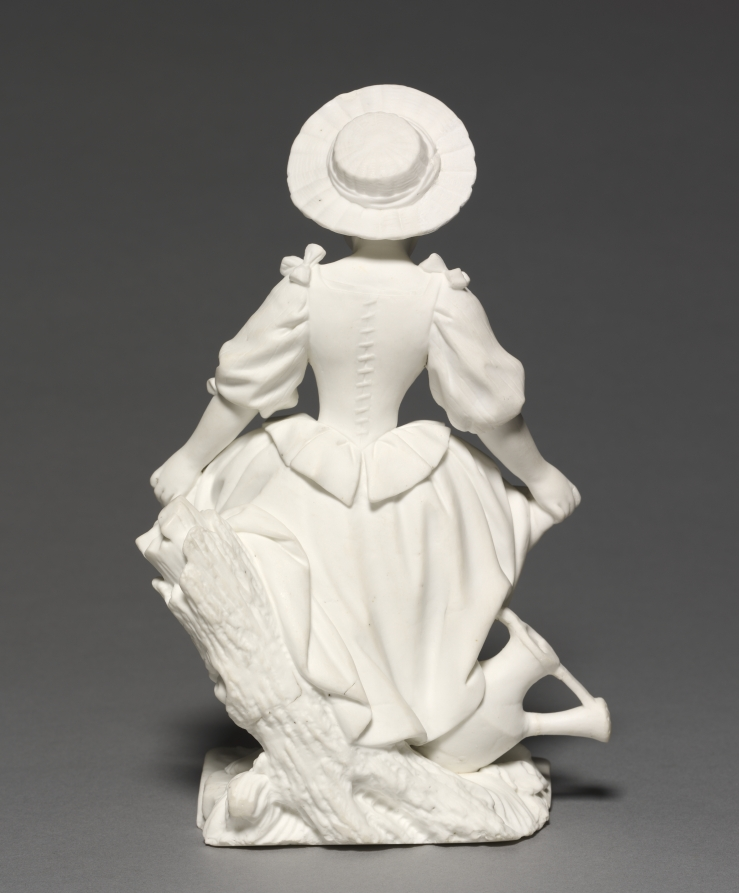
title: Figure of the Dancer (La Danseuse)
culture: France, Vincennes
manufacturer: Vincennes Porcelain Factory (France, 1740–56)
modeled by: Pierre Blondeau (French)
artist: after a design by François Boucher (French, 1703–1770)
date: 1748–52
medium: unglazed soft-paste porcelain (biscuit porcelain)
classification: Ceramic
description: Although a few Vincennes porcelain figures exist which are glazed, the royal factory adopted at an early date the practice of producing unglazed, biscuit figures which, because of the purity of their material, resemble marble figurines. The fashion for biscuit figures first introduced at Vincennes quickly spread through Europe.